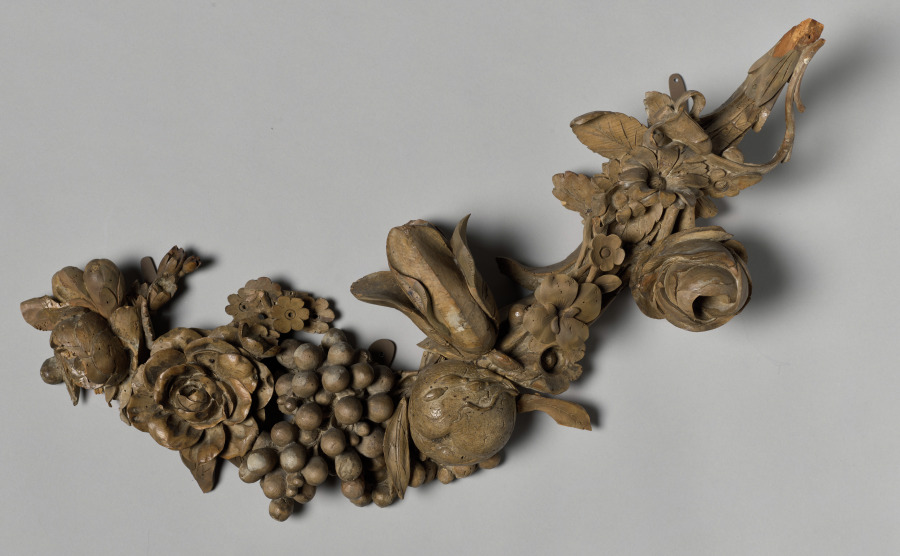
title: Carving from an Overmantel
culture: England, 17th century (Charles II)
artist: Grinling Gibbons (British, 1648–1721)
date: c. 1675–1677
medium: lindenwood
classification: Sculpture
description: The arrangement of architectural elements within grand interior spaces in the late 1600s and early 1700s emphasized symmetry and height. Decorative elements such as elaborately carved mantels, mirrors, paintings, and applied wall decorations were often stacked to achieve a visual focal point at one or both ends of the room. This particular overmantel decoration once hung above the fireplace in the Green Drawing Room of the Earl of Essex at Cassiobury in Watford, near London. In 1823, the British painter William Henry Hunt (1790–1864) produced a watercolor of the drawing room which featured this overmantel decoration. Grinling Gibbons was born in Rotterdam, the Netherlands, of English parents. After training there as an artist, he came to England in the 1660s and soon began to work as a sculptor of interior ornament, particularly in wood. One of his first large-scale decorative projects was the series of interiors at Cassiobury House.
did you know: The swags of fruit and foliage featured in this wooden overmantel decoration evoke the bounty of the English countryside.